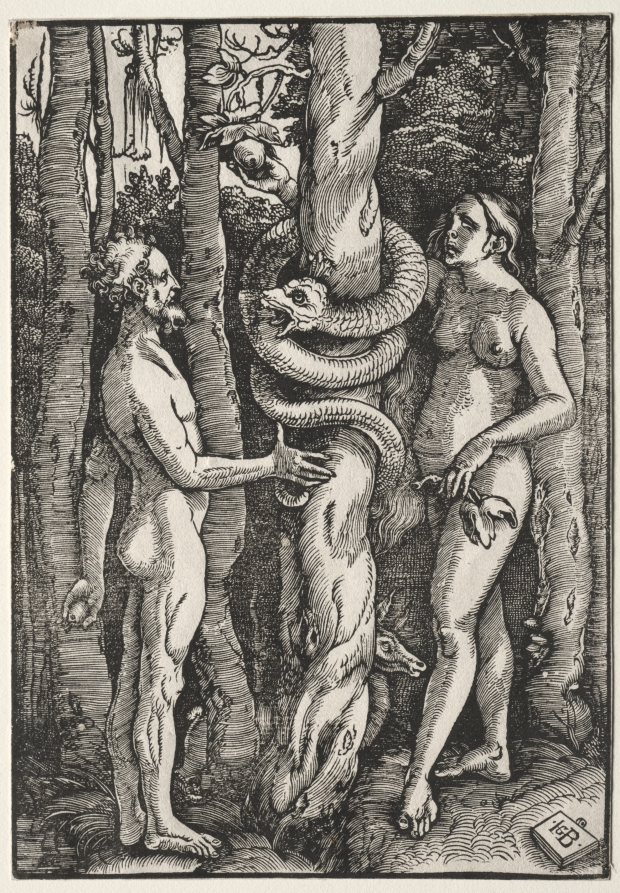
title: Adam and Eve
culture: Germany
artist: Hans Baldung (German, 1484/85–1545)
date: c. 1514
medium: woodcut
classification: Print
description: A student of Albrecht Dürer, Hans Baldung absorbed his master’s ideas for his own version of Adam and Eve. Set within a dark northern European forest, the first couple has already plucked the fruit from the central tree of knowledge. The starring role in the narrative goes to the serpent, whose massive form wraps around the tree, its monstrous head with jaws agape pointed toward Adam. With simplified garden imagery, the image may focus on the question of who bears responsibility for original sin: Adam, Eve, or the devil.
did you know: The initials "HBG" on the tablet at lower right are the initials of the artist, Hans Baldung Grien.